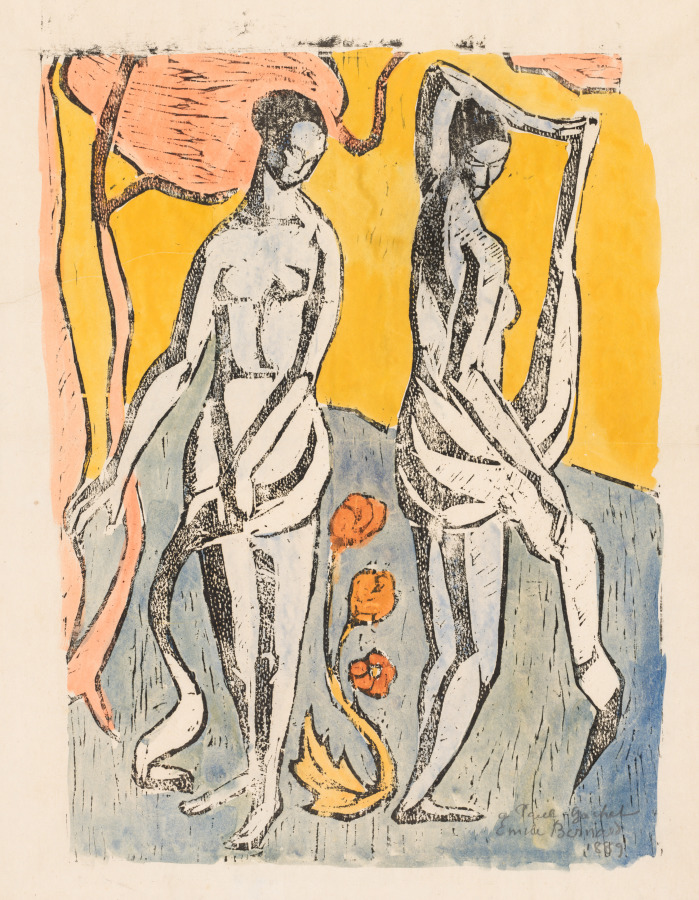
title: The Nymphs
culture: France, 19th century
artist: Émile Bernard (French, 1868–1941)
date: 1890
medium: Woodcut, hand-colored with watercolor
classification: Print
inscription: lower right, in graphite: a Paul Gachet / Emile Bernard / 1889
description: Before he had reached age 20, the precocious Bernard worked alongside Paul Gauguin and engaged in a lively correspondence with Vincent van Gogh. Toward the end of 1889, Van Gogh observed a shift in the young artist’s work and noted in a letter to his sister, “Bernard is trying to do elegant, modern figures in the manner of ancient Greek and Egyptian art.” The elongated, seemingly weightless forms in The Nymphs reflect Bernard’s stylistic evolution. This vividly hand-colored woodcut is one of only three known impressions of this print.